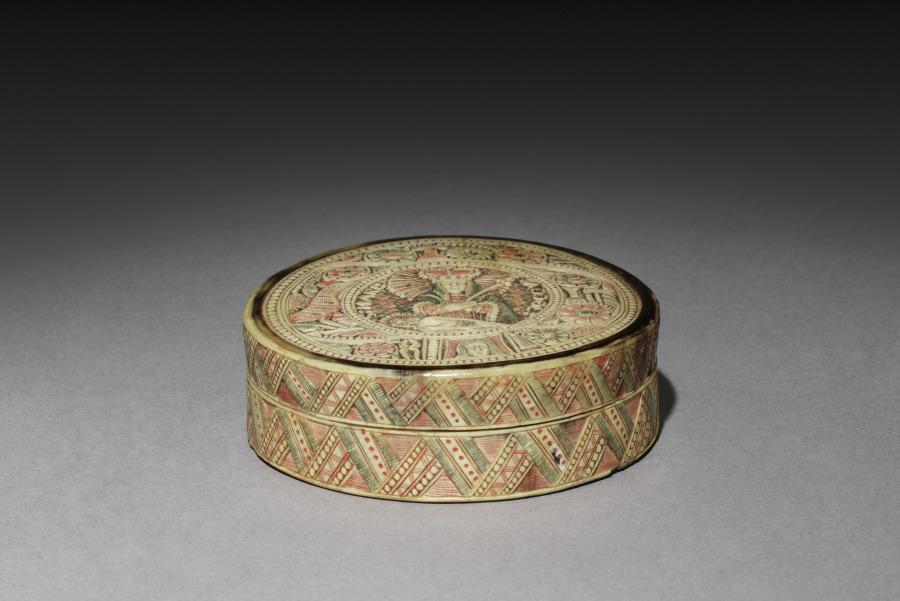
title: Box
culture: Spain (colonial ?), 19th century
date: 1800s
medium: bone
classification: Miscellaneous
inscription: on cover: "S:MARI:/ ADDOL:"; on back: "S:MARIAD:PIETA."